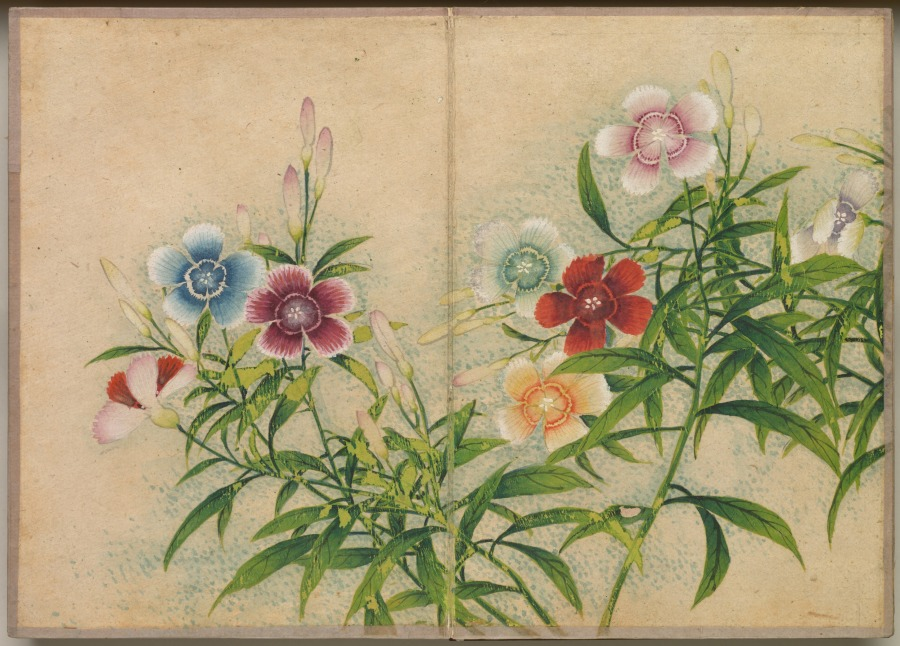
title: Desk Album: Flower and Bird Paintings (Pinks)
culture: China, Qing dynasty (1644-1911)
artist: Zhang Ruoai (Chinese, 1713–1746)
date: 1700s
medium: album leaf, ink and color on paper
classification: Painting